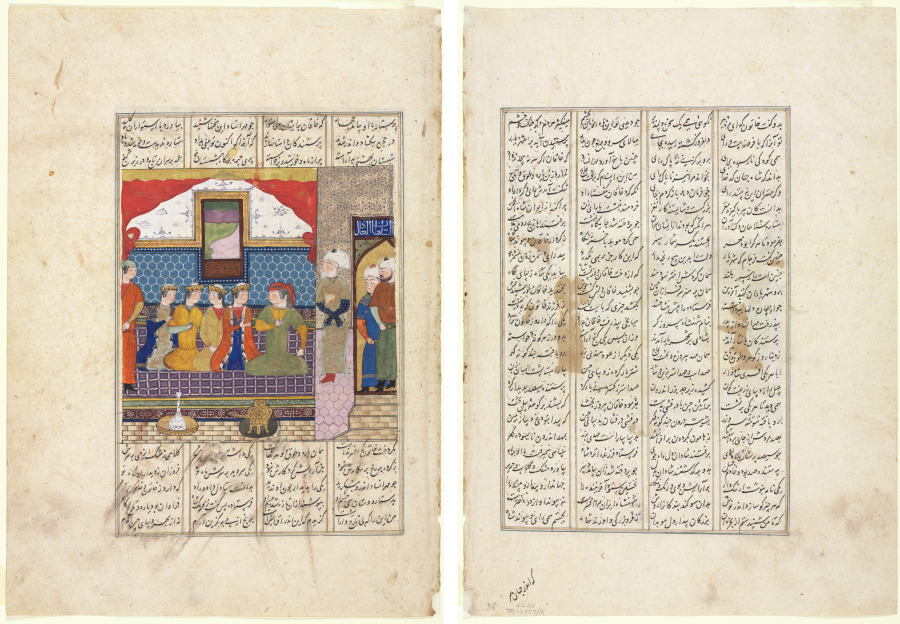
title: Nushirwan Sends Mihran Sitad to Fetch the Daughter of the King of China (Recto); The Forty-Eighth Year of Nushirwan's Reign. The Combat of the Khaqan of China with the Haithalians (Verso)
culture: Iran, Shiraz, Timurid period (1370-1501)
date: c. 1482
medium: opaque watercolor, ink, and gold on paper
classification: Manuscript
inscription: Script: Nasta'liq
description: The Iranian painting traditions of creating a conceptual space, symmetry, and decoration characterize this illustration of a scene in the life of the Shi’a Imam Ali, son-in-law of the Prophet Muhammad. The inscription over the door reads “the just sultan.”